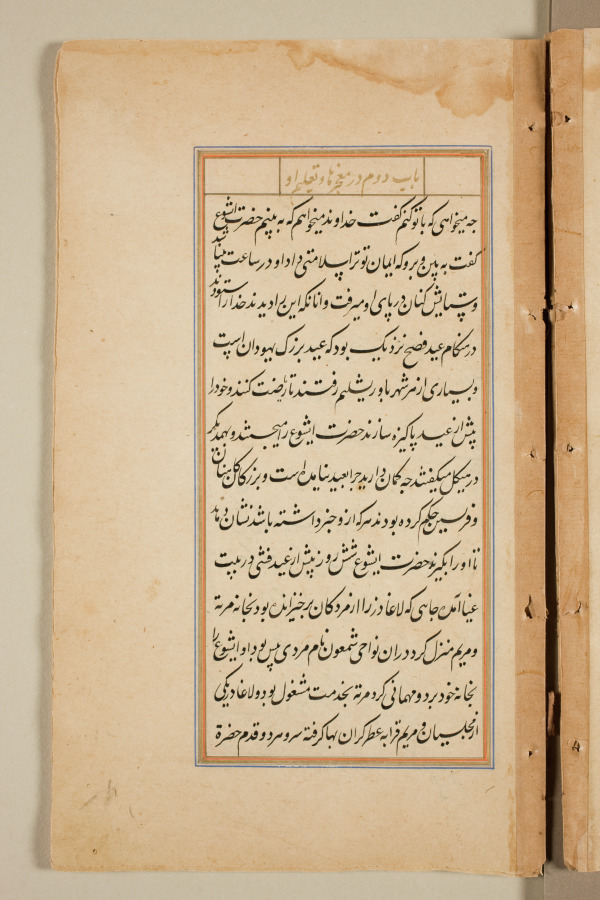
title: Text page from a Mirror of Holiness (Mir’at al-quds) of Father Jerome Xavier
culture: Mughal India, Allahabad, made for Prince Salim (1569–1627)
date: 1602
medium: Ink and gold on paper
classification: Manuscript